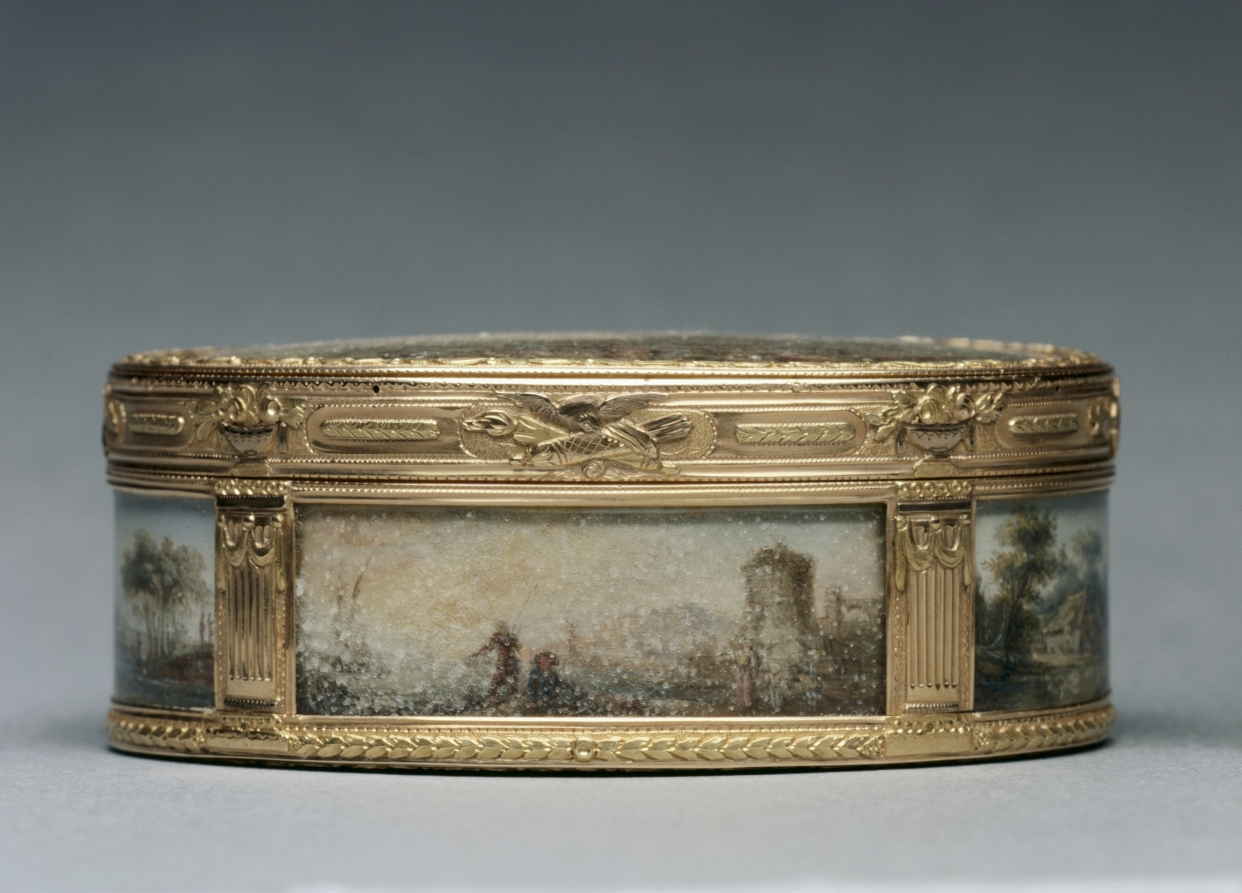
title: Snuff Box (Tabatière)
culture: France, 18th century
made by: Pierre-Nicholas Pleyard (French)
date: 1768–69; 1776–78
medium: gouache miniatures mounted on gold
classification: Metalwork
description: Snuff boxes were highly ornamented functional objects popular among French social elites. They were simultaneously containers for powdered tobacco and a means to communicate social and political status. Often decorated with miniature paintings inspired by popular paintings of the time, the works reproduced on this box are modeled after those of Claude-Joseph Vernet (cover and front panel) and David Teniers the Younger (base, side, and back panels).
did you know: These miniature paintings are mounted à cage, a practice popular in the mid-1700s that involved setting decorated panels into gold frames to create a box’s walls.